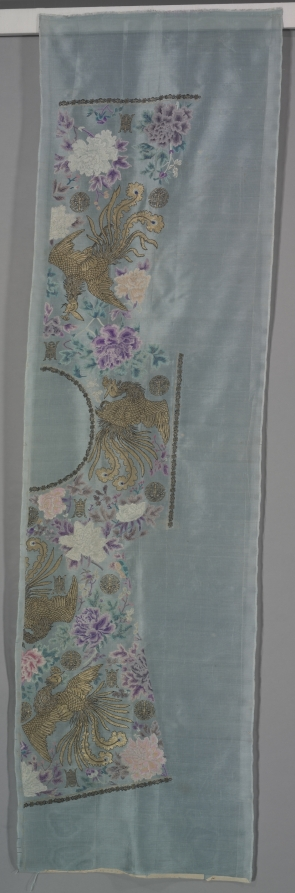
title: Uncut Robe: Proper Left Front and Back Panel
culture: China, Qing dynasty (1644–1911)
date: c. 1890s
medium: embroidered silk, gauze weave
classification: Garment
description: This is one of three panels of silk netting that would have been cut out and sewn into a gown. This continuous length of fabric would become the gown's proper left front and back panel. The airy fabric is embroidered in gold, white, blues, pinks, and violets with designs of phoenix birds, chrysanthemums, and symbols of longevity.